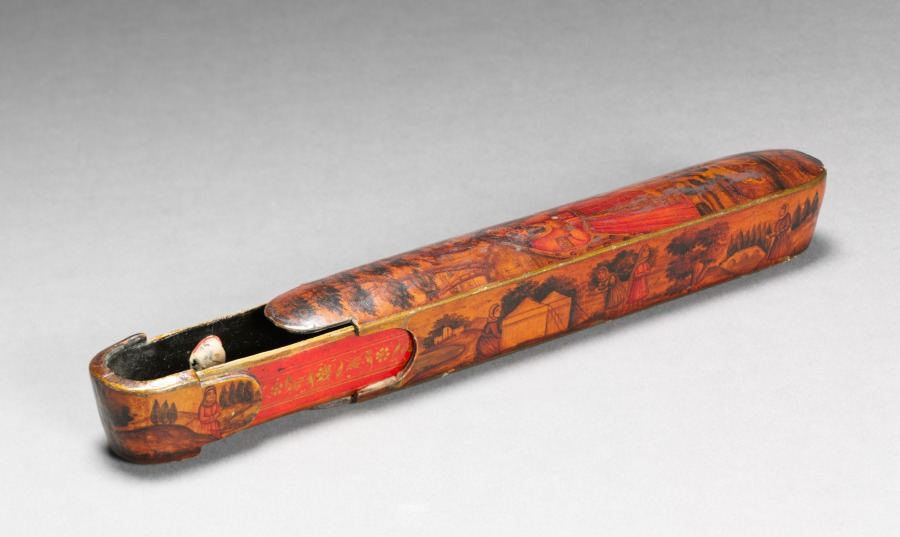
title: Pen and Ink Box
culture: Iran, Qajar period (1779-1925)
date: 1800s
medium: lacquer over papier maché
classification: Lacquer